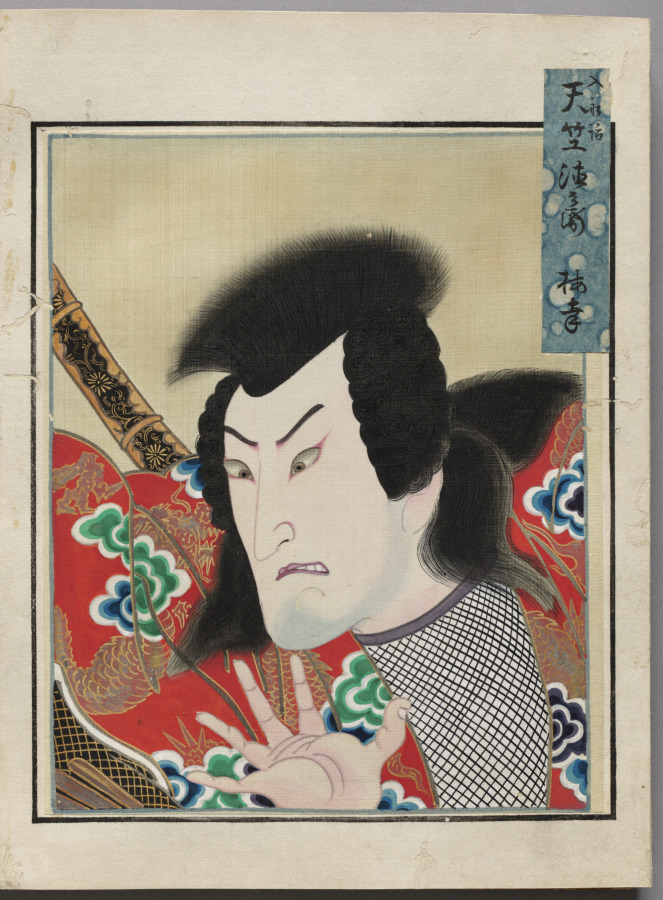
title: Double-Leaf from Album of Actor Portraits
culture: Japan, Edo period (1615–1868)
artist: Shōrakusai (Japanese)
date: c. 1790–1810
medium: double-leaf from an accordion-style album; ink and color on silk (left)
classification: Bound Volume